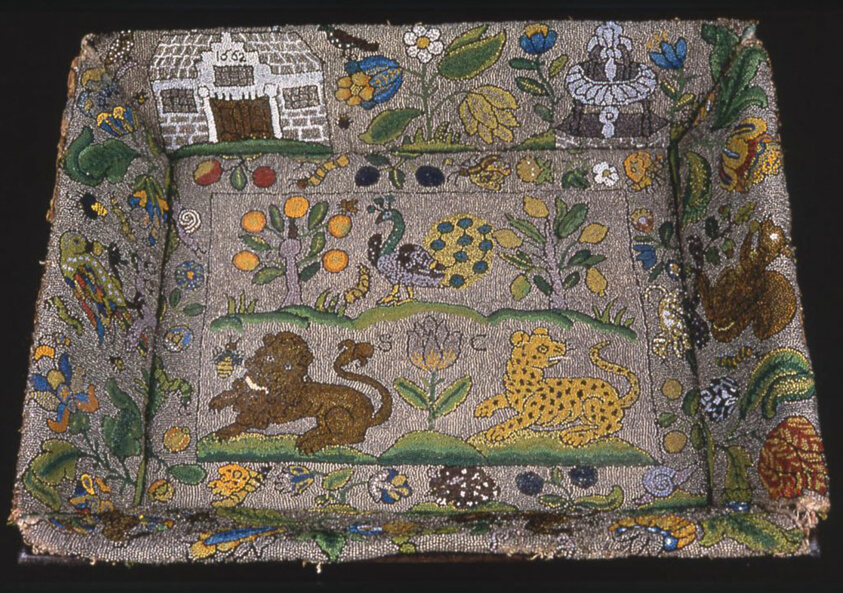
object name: Textile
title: Basket Insert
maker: England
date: 1662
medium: Linen, plain weave; beaded with glass beads; backed with cardboard; lined with silk, plain weave with supplementary patterning wefts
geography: England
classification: textile; needlework (visual works)